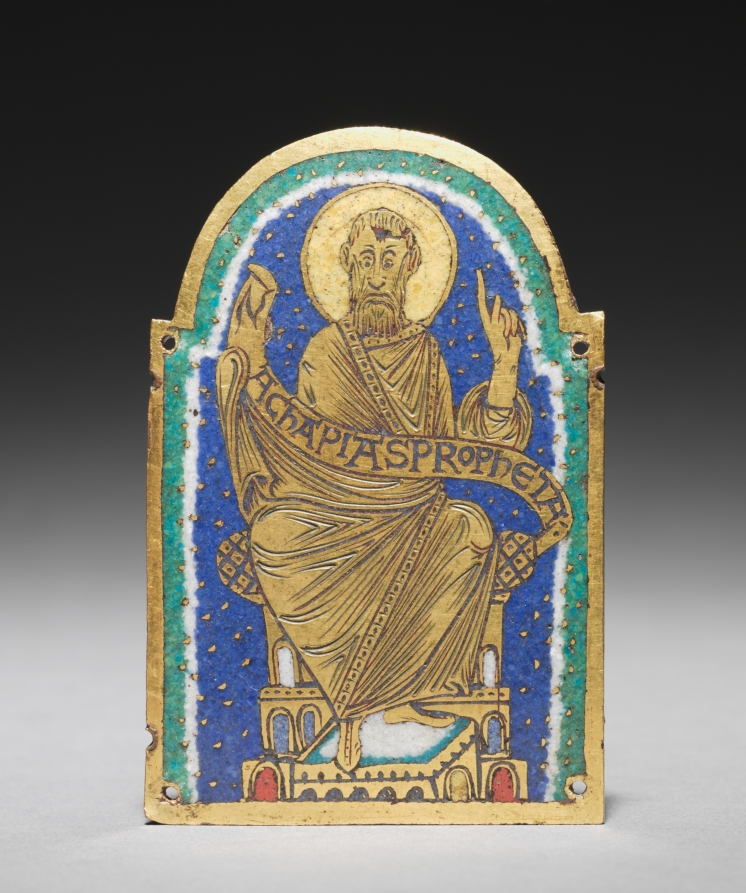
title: Plaque with Seated Prophet from a Reliquary Shrine: Achapias (Obadiah)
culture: Germany, Lower Saxony, Hildesheim, Romanesque period, 12th century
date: c. 1170–80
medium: gilded copper, champlevé enamel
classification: Enamel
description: Once used as decorations for a reliquary shrine, each enamel plaque represents a biblical prophet: Isaiah, Obadiah, Elisha, and Hosea. Fine gold dots punctuate dark blue backgrounds. Typical of Hildesheim enamels, this detailing creates the illusion that the prophets sit against star-studded twilight skies.